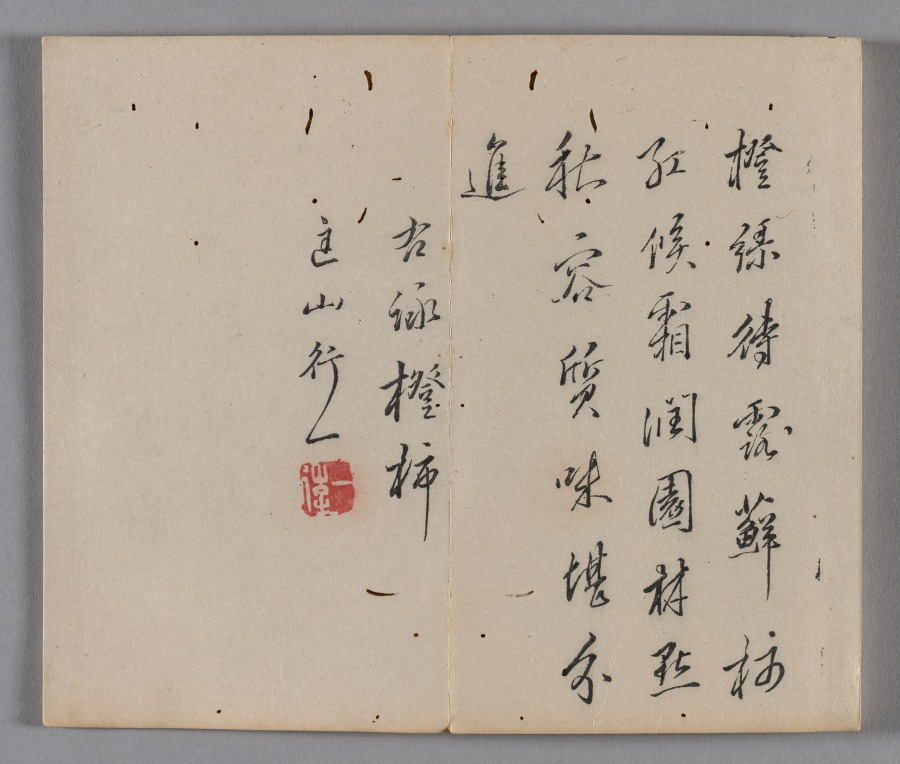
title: Ten Bamboo Studio Painting and Calligraphy Handbook (Shizhuzhai shuhua pu): Fruit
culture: China, Qing dynasty (1644-1911)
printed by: Hu Zhengyan (Chinese, c. 1584–1674)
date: 1633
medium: Woodblock-printed book; ink and colors on paper; first edition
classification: Print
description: Color printing reached a level of perfection in the early 1600s, as seen in this Ten Bamboo Studio Collection of Calligraphy and Painting and the Mustard Seed Garden Manual of Painting (printed 1679 and 1701). The painterly quality, precision in registering (aligning) the woodblocks, and harmonious colors made them the most successful color print editions in Chinese history. Both editions were printed and compiled in Nanjing, spread nationwide, and had a great impact on the arts in Japan and Korea.